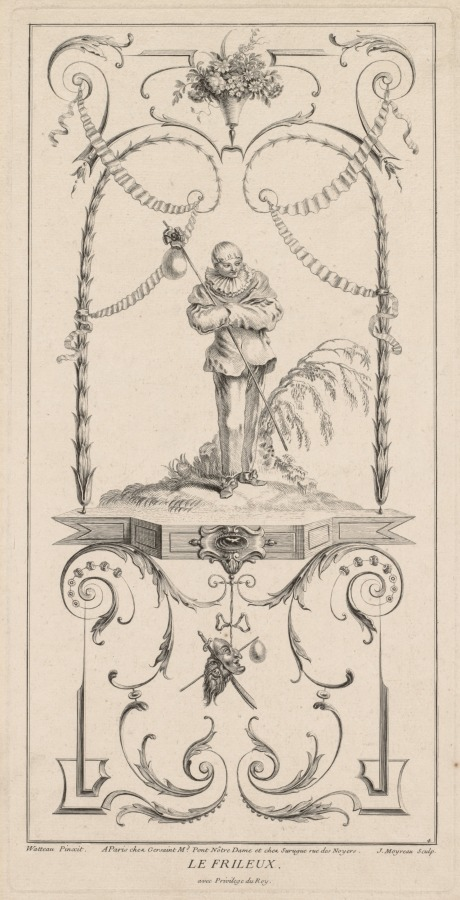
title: Le Frileux, Arabesque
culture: France, 18th century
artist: Jean Moyreau (French, 1690–1762)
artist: after Jean-Antoine Watteau (French, 1684–1721)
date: c. 1729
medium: engraving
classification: Print